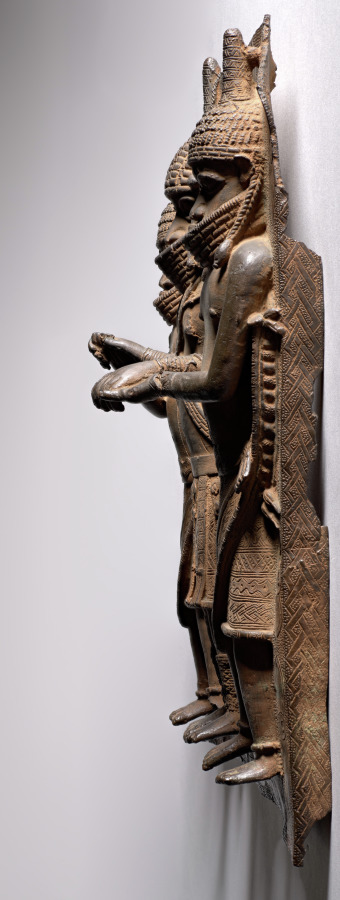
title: Plaque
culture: Nigeria, Benin Kingdom, Ẹdo peoples, members of the Igun Eronmwon (royal brasscasters) guild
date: 1500s–1600s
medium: Copper alloy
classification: Sculpture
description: Nearly 900 metal plaques once adorned the Ọba’s palace courtyard, documenting Benin’s history and customs. This one depicts two male attendants (enobore) supporting an Ọba. It uses hierarchical composition: important figures are large and centered. Everything about the Ọba is greater than his companions: their bodies, clothing, and jewelry. The flanking attendants physically support a man weighed down by heavy royal garments and responsibilities. Brasscasters skillfully cast their clasping hands projecting from the plaque. The bottom left number means the British Museum formerly owned this. It entered their collection in 1898, one year after British troops took it from a palace storeroom during the Siege of Benin.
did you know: Look at the side of this plaque. The designs on the slender edges are considered visual "signatures" of the different casters who made plaques for the Oba of Benin.